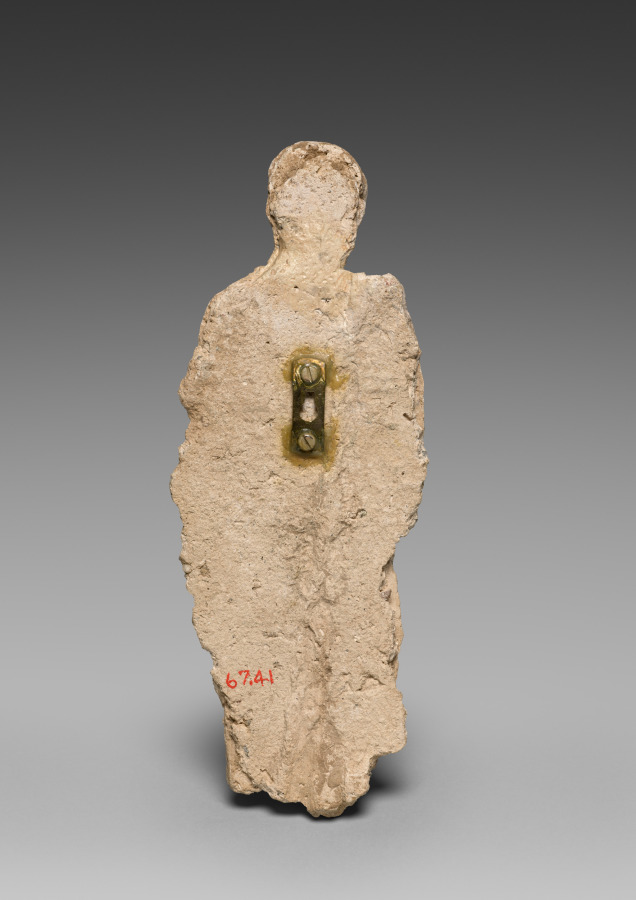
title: Monk bearing offerings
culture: Afghanistan, Hadda, probably Tape Shotor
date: c. 300 CE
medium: stucco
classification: Sculpture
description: This Buddhist monk wears a robe over one shoulder, and his hair has been shaved. He reverently brings offerings of fruit or flowers to the Buddha. Triads depicting the Buddha with attendants bringing offerings were set up on the base of monuments called stupas, in niches defined by pilasters with Corinthian-style columns indicative of the region's Hellenistic heritage.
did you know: This sculpture came from a monastery famous for preserving pieces of the Buddha's skull and robe.